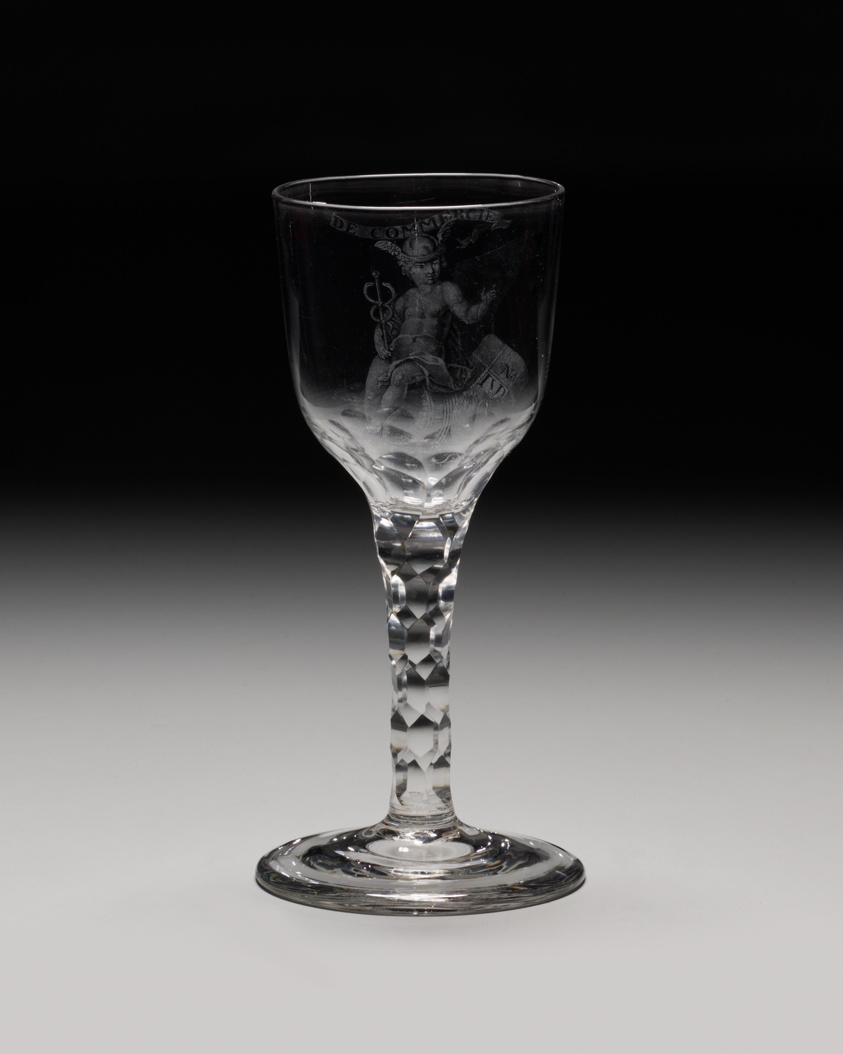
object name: Glass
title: Wine Glass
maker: England or Netherlands; Engraved by Jan van den Blyk (Dutch, active late 18th century)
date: c. 1775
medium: Glass; cut and stipple engraved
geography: Netherlands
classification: drinking vessel; glass; european decorative arts